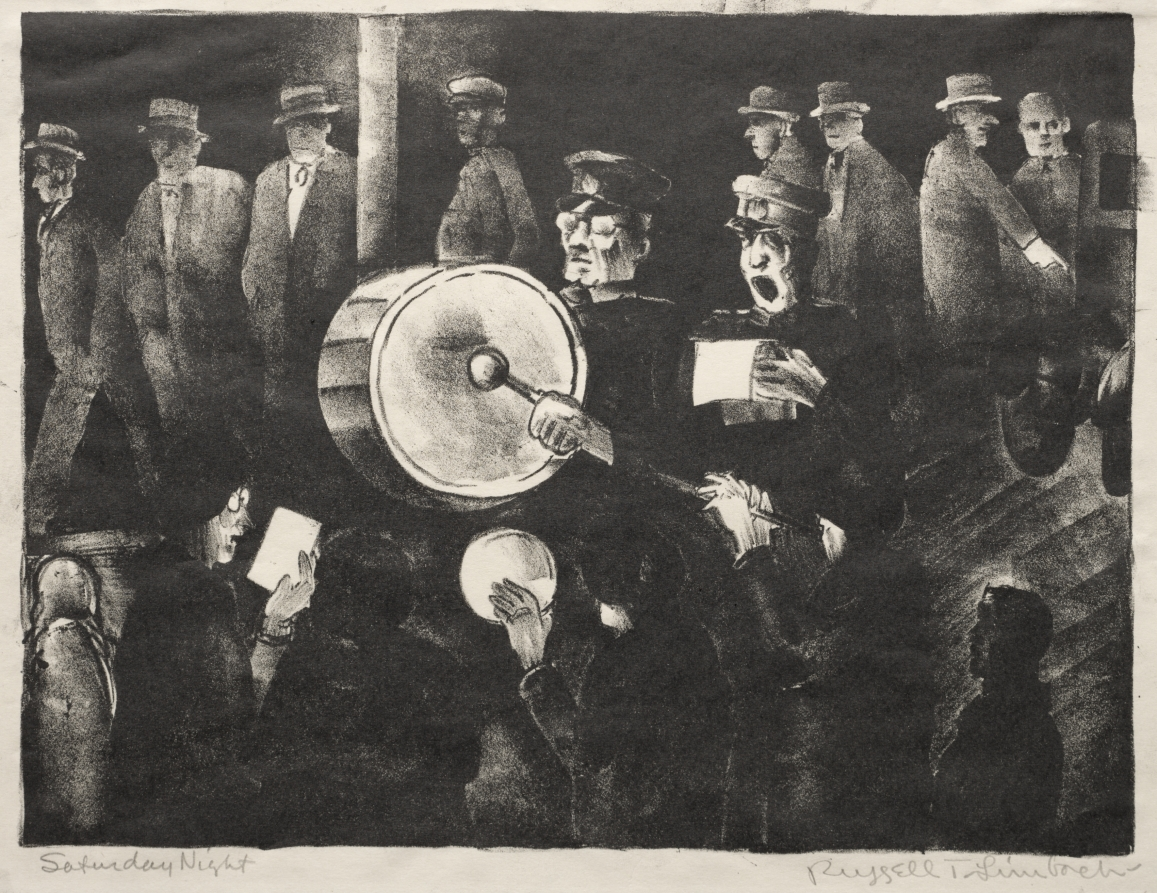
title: Saturday Night, Massillon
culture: America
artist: Russell T. Limbach (American, 1904–1971)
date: c. 1927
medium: lithograph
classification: Print